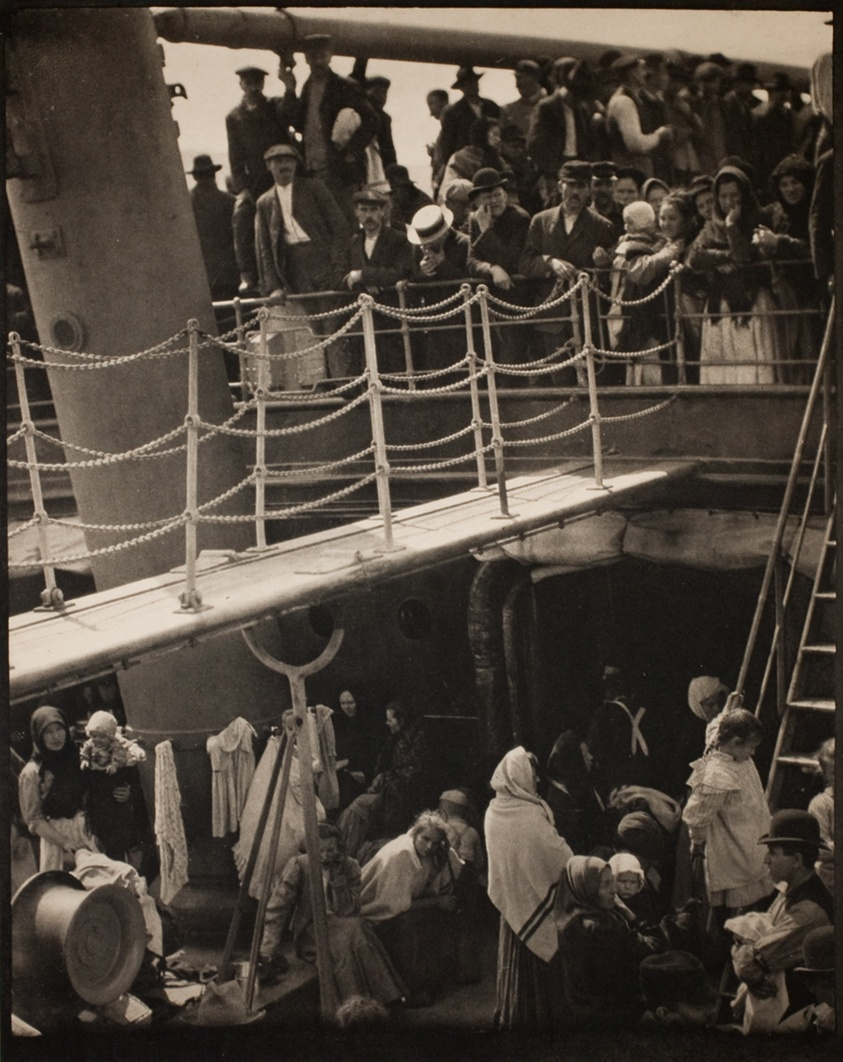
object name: Photograph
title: The Steerage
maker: Alfred Stieglitz (American, 1864-1946)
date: 1907, printed in or before 1913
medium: Photogravure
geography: United States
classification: photograph; photography